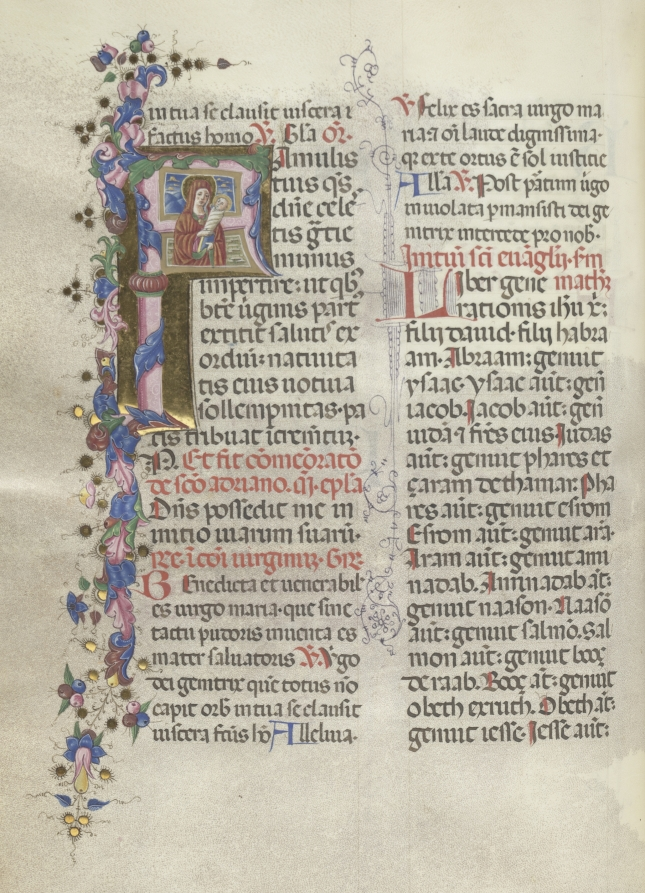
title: Missale: Fol. 311v: Saint Anne holding the newborn Virgin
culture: Italy, Perugia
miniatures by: Bartolommeo Caporali (Italian, c. 1420–1503)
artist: assisted by Giapeco Caporali (Italian, d. 1478)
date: 1469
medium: ink, tempera and burnished gold on vellum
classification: Bound Volume